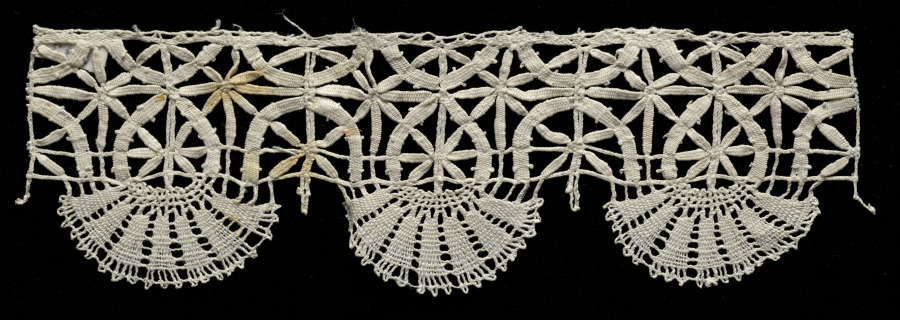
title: Lace Edging with Bell Points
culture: Italy, Genoa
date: 1600s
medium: Bobbin lace (rose lace)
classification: Lace